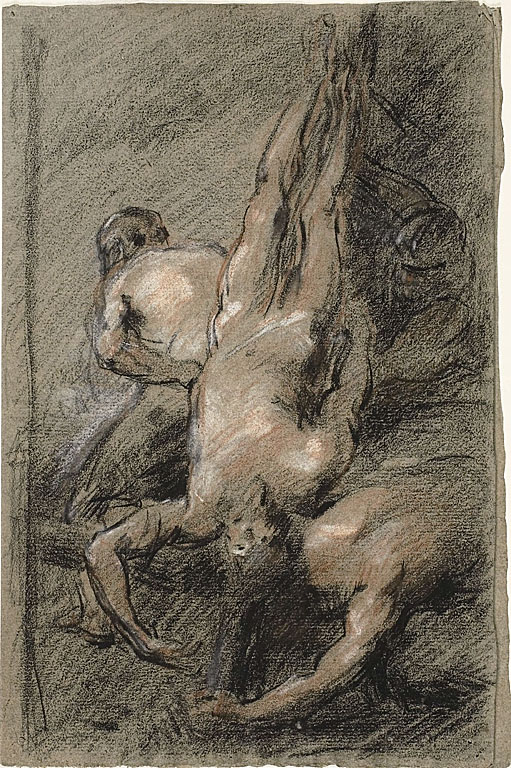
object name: Drawing and Watercolor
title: Martyrdom of Saint Peter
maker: Jean Baptiste Carpeaux (French, 1827-1875); after Anthony van Dyck (Flemish, 1599-1641)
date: 1863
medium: Black, red and white chalk on gray-brown laid paper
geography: France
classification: chalk; drawings (visual works); prints and drawing